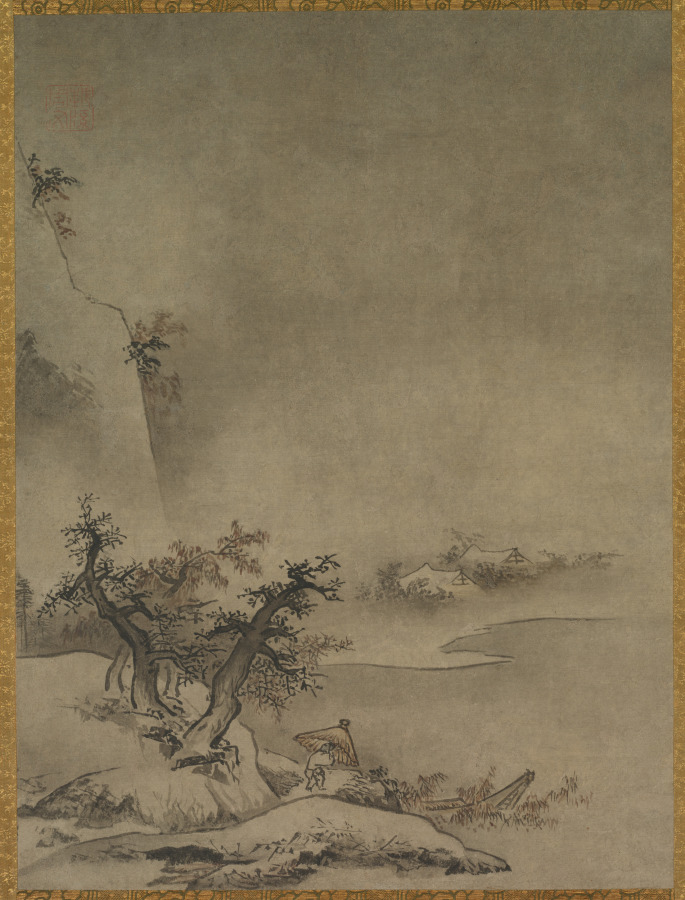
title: Chinese Servant Walking in the Rain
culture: Japan, Muromachi period (1392–1573)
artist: attributed to Gakuō Zōkyū (Japanese, active about 1482–1514)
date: 1500s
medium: hanging scroll; ink on paper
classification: Painting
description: Attributed to the artist Gakuō, this painting has a spurious seal of the influential Shōkokuji temple monk-painter Tenshō Shūbun (died about 1444–50), with whom he is said to have trained. Gakuō may have hailed from Ise in present-day Wakayama prefecture, an area south of Kyoto in the Kansai region. Although not much is known about his life, inscriptions on some of his paintings indicate strong ties with eminent monks in Kyoto’s major Zen temples.